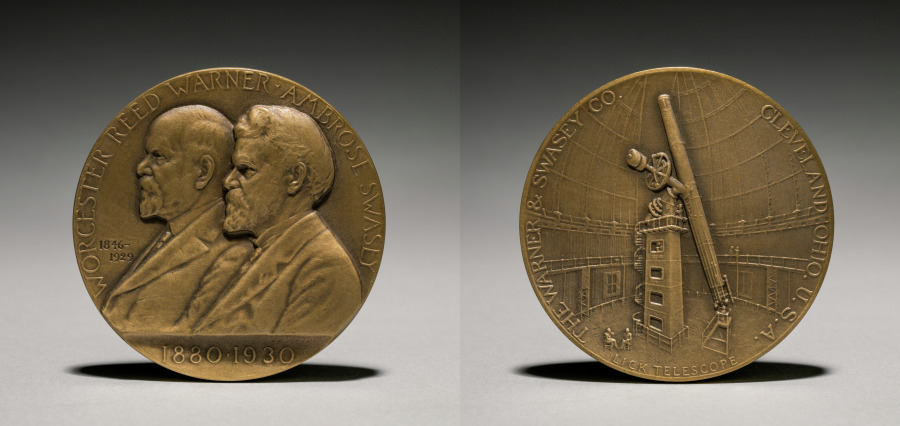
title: Medal: In Commemoration of the Fiftieth Anniversary - The Warner and Swasey Company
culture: America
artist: Victor D. Brenner (American, 1871–1924)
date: 1930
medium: bronze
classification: Metalwork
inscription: obverse - encircling the busts: "WORCESTER REED WARNER . AMBROSE SWASEY"; center below: "1880-1920"; at left beside bust of Worcester R. Warner: "1846-1929"; under bust at right: "V. D. BRENNER." reverse - center bottom: "LICK TELESCOPE"; left: "THE WARNER & SWASEY CO."; right: "CLEVELAND, OHIO, U. S. A.